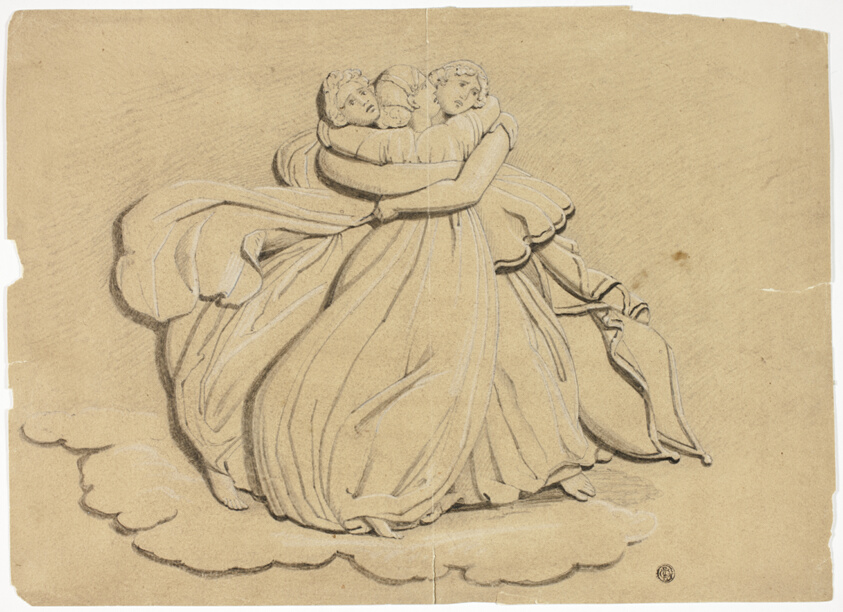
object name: Drawing and Watercolor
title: The Daughters of Pandarus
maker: After John Flaxman; English, 1755-1826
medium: Charcoal and graphite, heightened with white chalk, on cream wove paper prepared with a pale brown wash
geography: England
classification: pen and ink drawings; drawings (visual works); prints and drawing